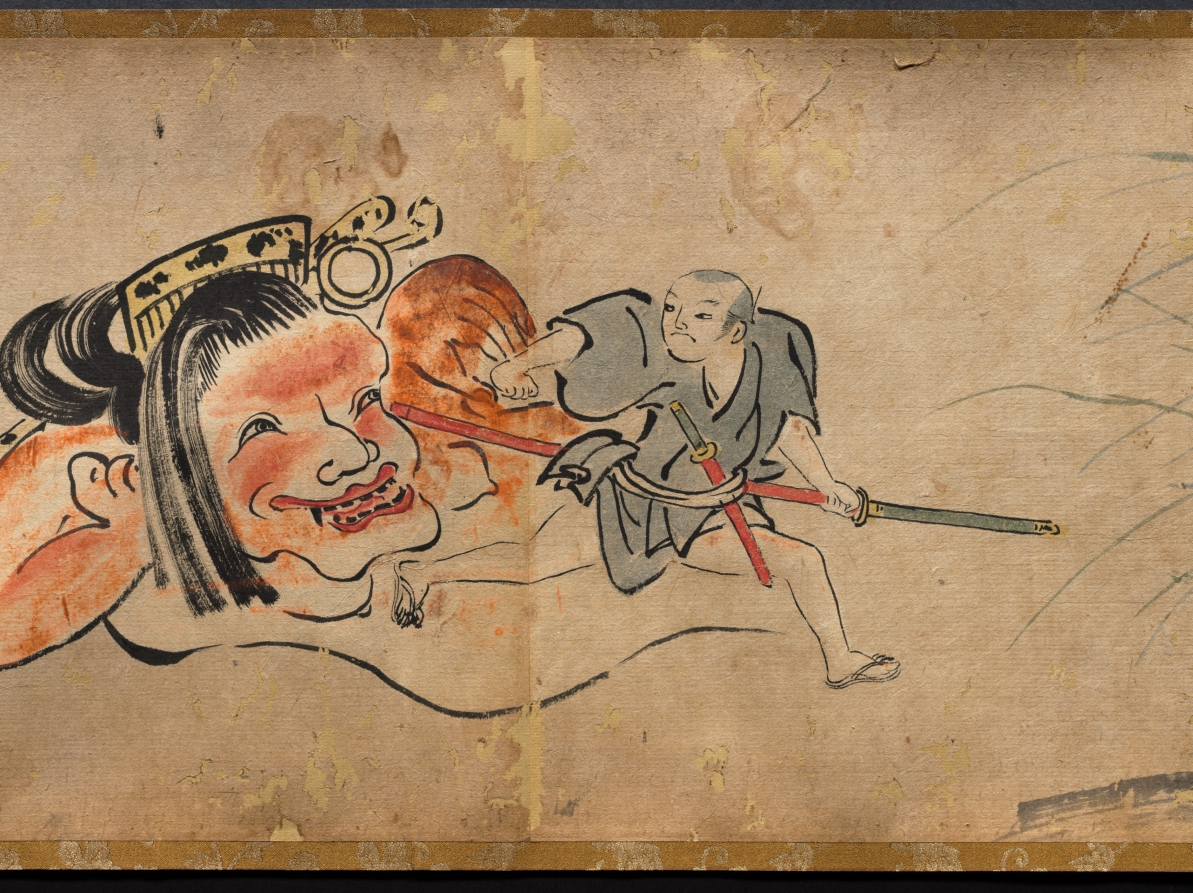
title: The Illustrated Tale of Oishi Hyōroku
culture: Japan, Edo period (1615–1868)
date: 1700s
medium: handscroll; ink and color on paper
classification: Painting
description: This incomplete handscroll illustrates part of the story of Oishi Hyoroku, a young man tasked with battling fox apparitions who were creating problems in his town. In other extant versions of the scroll, the story is set in the fall of 1624 in Kagoshima in southern Japan. Throughout the story, Hyoroku is tricked and terrified by the foxes that shift their shapes into a variety of monstrous phantoms. After repeated humiliations, he eventually captures two of the foxes. In this version, colloquial texts that function like text blurbs in comics appear throughout the scroll, but the main text is missing.